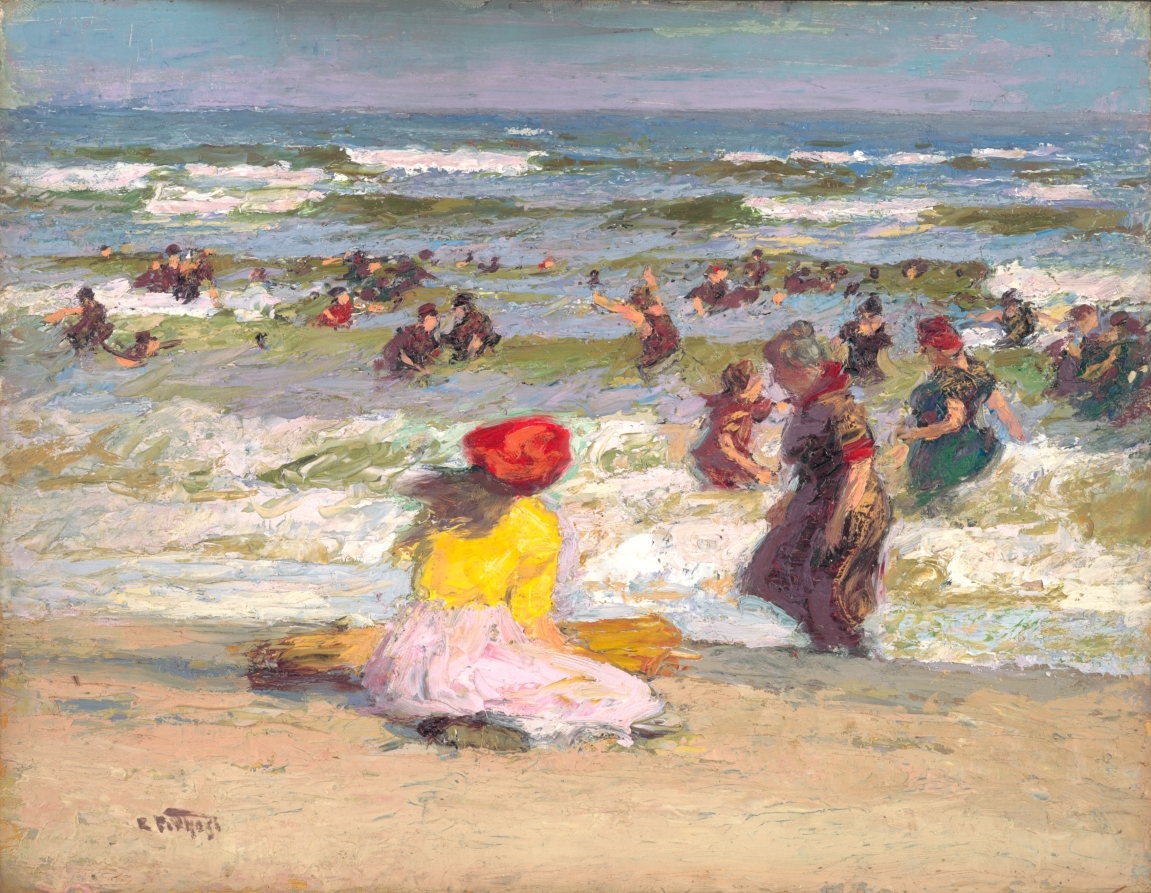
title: In the Surf (recto)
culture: America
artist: Edward H. Potthast (American, 1857–1927)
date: c. 1910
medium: oil on panel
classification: Painting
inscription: bottom left: E Potthast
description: Born in Cincinnati, Potthast studied in Munich and Paris before returning to the United States, where he began spending summers along the coast of New England. There he studied the carefree seaside activities of bathers and picnickers. Although he never married, he was particularly fond of painting young mothers and their children.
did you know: During the early 1900s, modesty dictated women’s bathing suit designs featuring long, loose-fitting skirts.